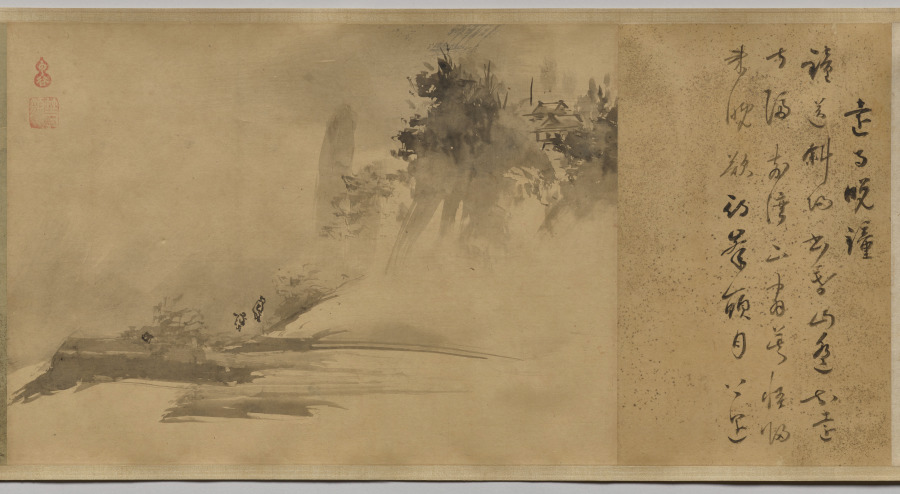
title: Poems and Pictures of the Eight Views of Xiao-Xiang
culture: Japan, Momoyama period (1573–1615)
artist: Unkoku Tōgan (Japanese, 1547–1618)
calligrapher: Inkei Gentetsu (Japanese, 1562–1612)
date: 1605–12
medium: Handscroll; ink on paper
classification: Painting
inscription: Each painting sealed with red gourd-shaped seal reading Unkoku (雲谷) and a square seal reading Tōgan (等顔).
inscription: Each painting prefaced with a titled poem on the Eight Views of Xiao-Xiang by Yujian Ruofen (active late 13th century) inscribed by Japanese Buddhist monk Inkei Gentetsu (1562–1612).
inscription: 右寫玉㵎之筆勢／雪舟末葉等顔筆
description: Unkoku Tōgan brushed these scenes using the splashed-ink technique associated in Japan with the Chinese monk Yujian Ruofen (active late 1200s). Xiao-Xiang refers to the region in present-day Hunan province, where the Xiang River and its tributaries converge. Each of the eight views evokes a time of day or season. The earliest surviving series of Xiao-Xiang paintings is by Wang Hong (active mid-1100s), but textual evidence tells us the theme appears earlier. It was later adopted in Japan and Korea, as seen here. The poems were inscribed by Inkei Gentetsu, the third abbot of the Rinzai Zen temple Tōshunji, Japan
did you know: The “Tō” of Tōgan comes from the name of painter Sesshū Tōyō (1420–1506).